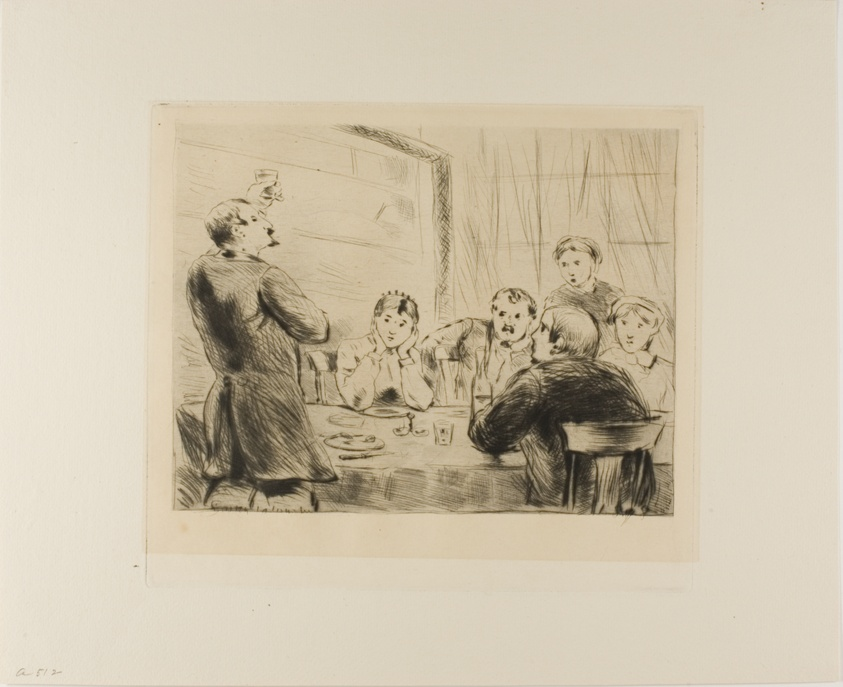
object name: Print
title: Plate from l'Assommoir (man proposing a toast at table with five other people)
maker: Gaston La Touche (French, 1854-1913)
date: 1878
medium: Drypoint and plate tone on ivory laid paper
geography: France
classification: drypoint; print; prints and drawing